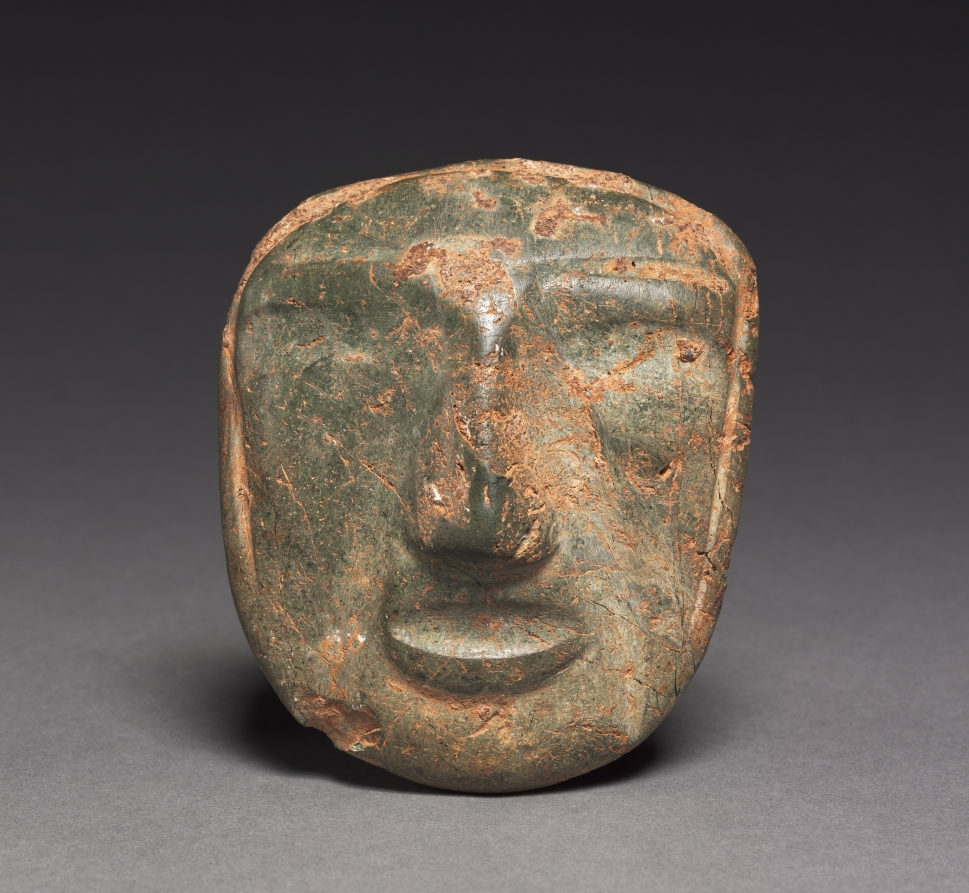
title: Mask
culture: Mesoamerica, Mexico, Guerrero, Mezcala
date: 1–800 CE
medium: stone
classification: Sculpture